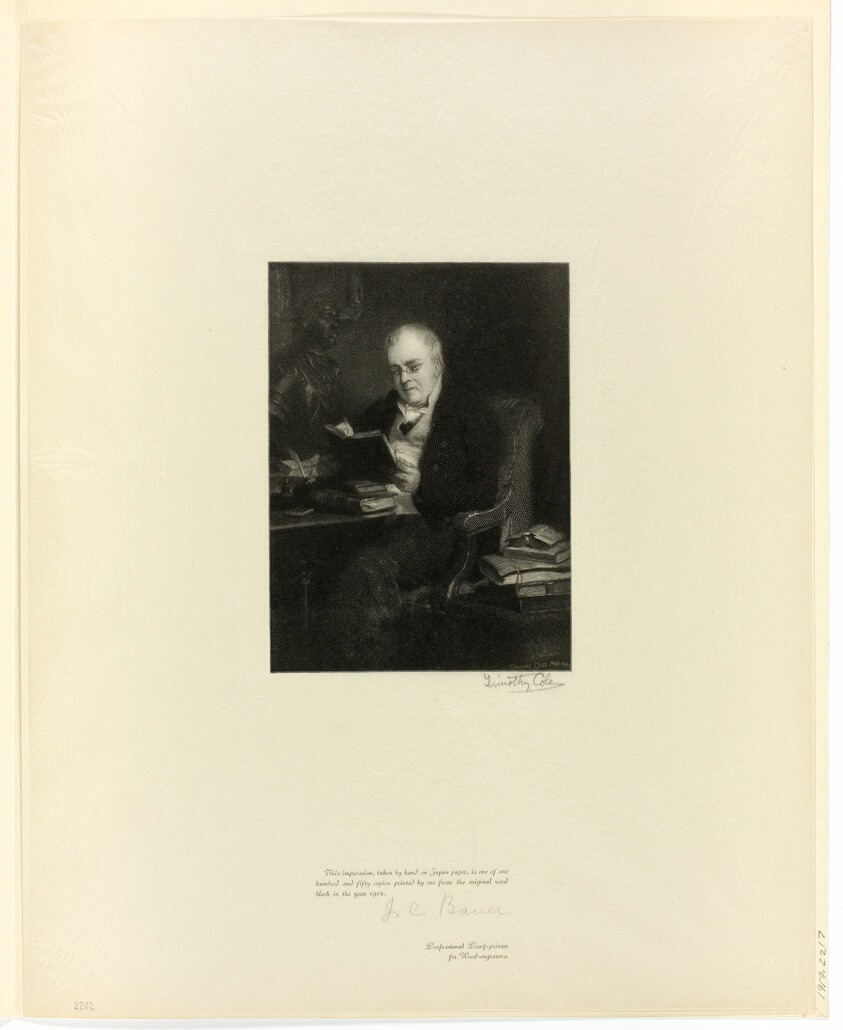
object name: Print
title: Portrait of Dr. John Allen, from Old English Masters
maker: Timothy Cole (American, born England, 1852-1931); after Edwin Henry Landseer (English, 1802-1873)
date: 1901, printed 1902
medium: Wood engraving on chine paper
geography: United States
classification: wood engraving; print; prints and drawing